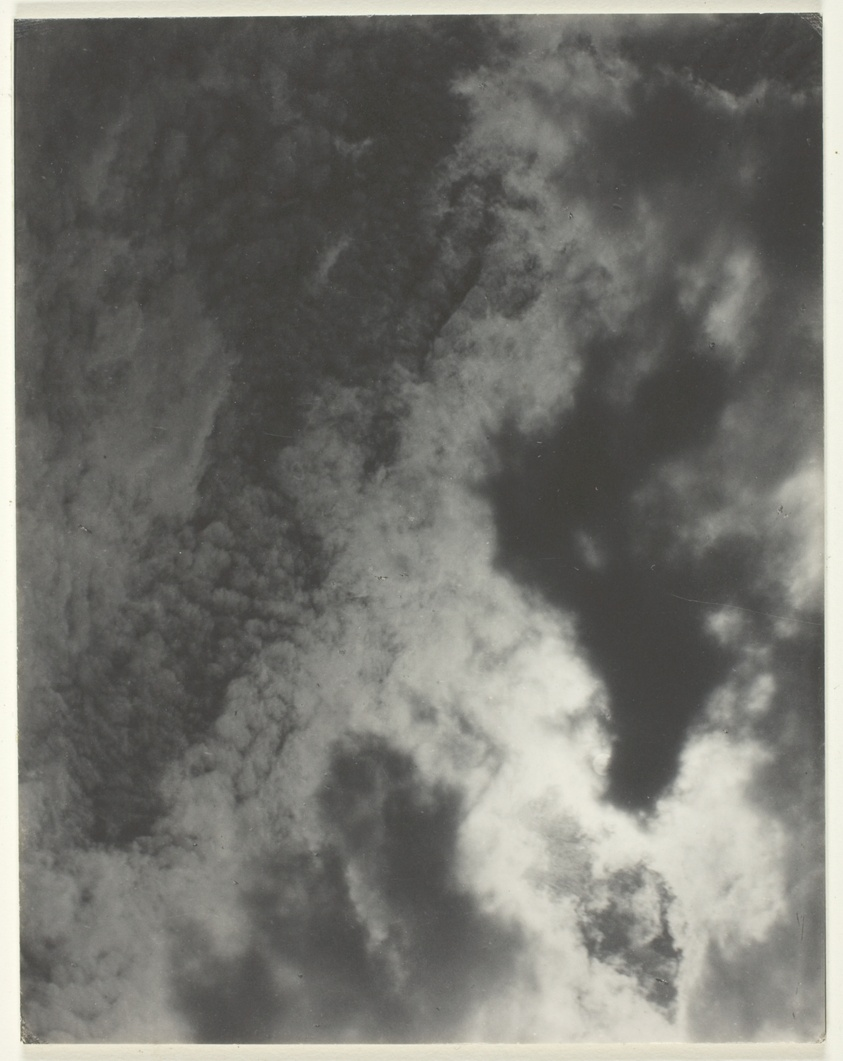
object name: Photograph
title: Equivalent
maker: Alfred Stieglitz (American, 1864–1946)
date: 1925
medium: Gelatin silver print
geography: United States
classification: gelatin silver (developing-out-paper) pr; photographic process; photography; photograph